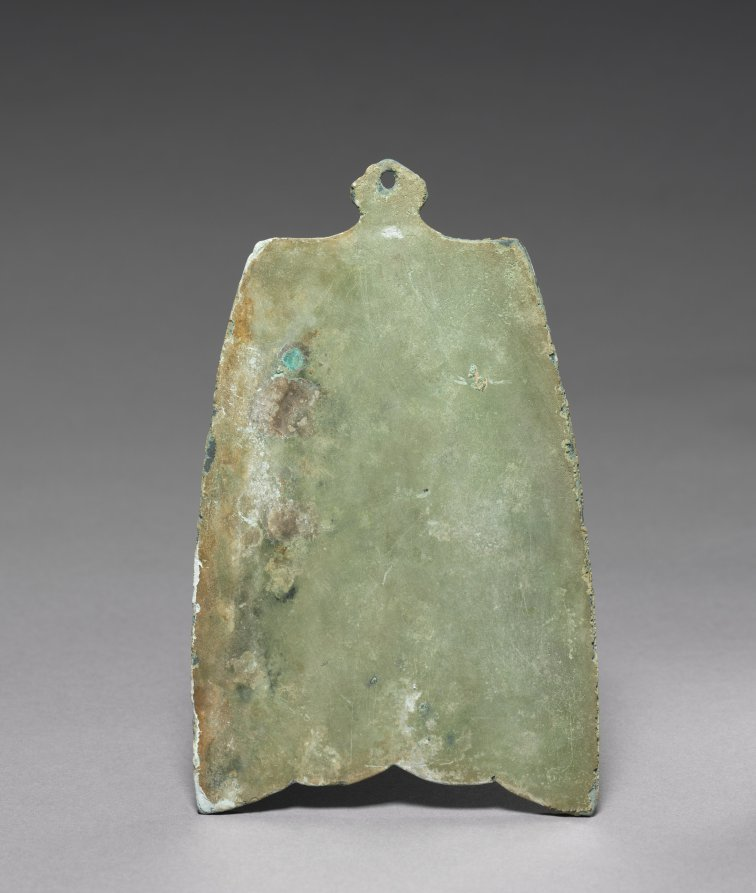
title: Bell-shaped Mirror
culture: Korea, Goryeo dynasty (918–1392)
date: 918–1392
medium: bronze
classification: Metalwork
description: From ancient times, a mirror assumed various roles: a ritualistic tool, a diplomatic gift, and a luxury commodity. During the Goryeo dynasty (918–1392), which saw the great advancement of metallurgy, the royal court was the center of distributing sophisticated bronze artifacts. According to historical records, on the seventh day of the Lunar New Year, the king bestowed a bronze mirror inscribed with auspicious symbols upon each court official as part of a ceremony to celebrate the Day of Humans. This bronze mirror features a round concave surface that serves as the main decoration. Such concave surface can be traced back to the ancient time when a concave mirror was used to start a fire from sunlight during the daytime.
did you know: Due to its origin as an important tool in religion and politics, mirrors are often mentioned in many Korean proverbs that warn about certain behaviors.